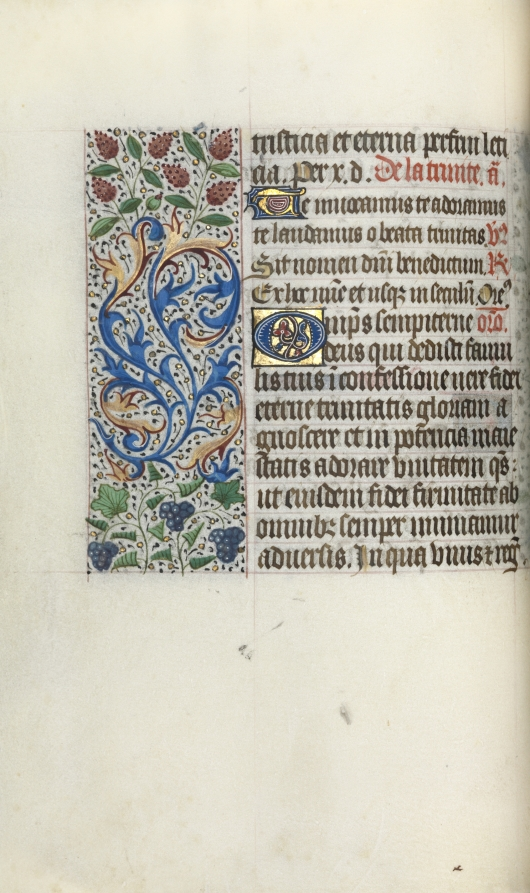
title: Book of Hours (Use of Rouen): fol. 49v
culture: France, Rouen, 15th century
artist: Master of the Geneva Latini (French, active Rouen, 1460–80)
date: c. 1470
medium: ink, tempera, and gold on vellum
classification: Bound Volume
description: In the late 1400s and early 1500s Rouen was an established and important center of book production. The city’s cathedral had a wealthy chapter that spent large sums of money to commission books and to maintain its extensive library. The stationers and booksellers would have likely been concentrated in or near the cathedral precinct. This artist, named after a manuscript now in Geneva, was Rouen’s principal illuminator during the second half of the 1400s.